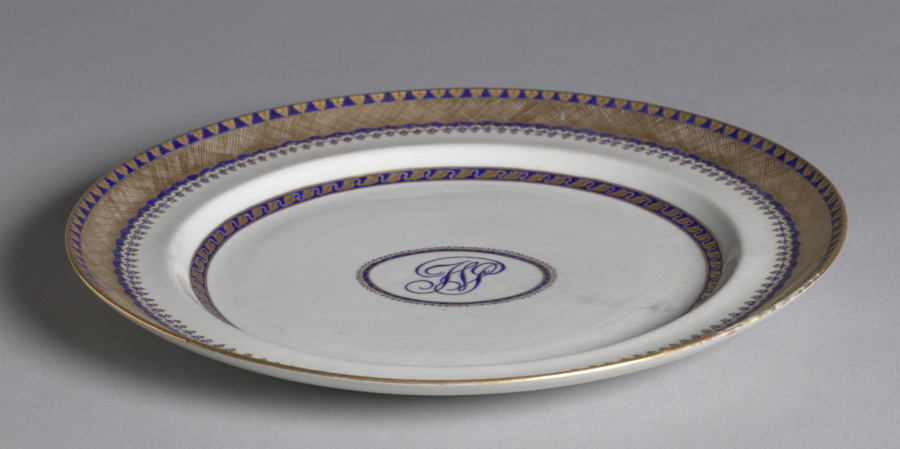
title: Dinner Plate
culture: China, Chinese Export, 18th century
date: 1785–1800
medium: porcelain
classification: Ceramic